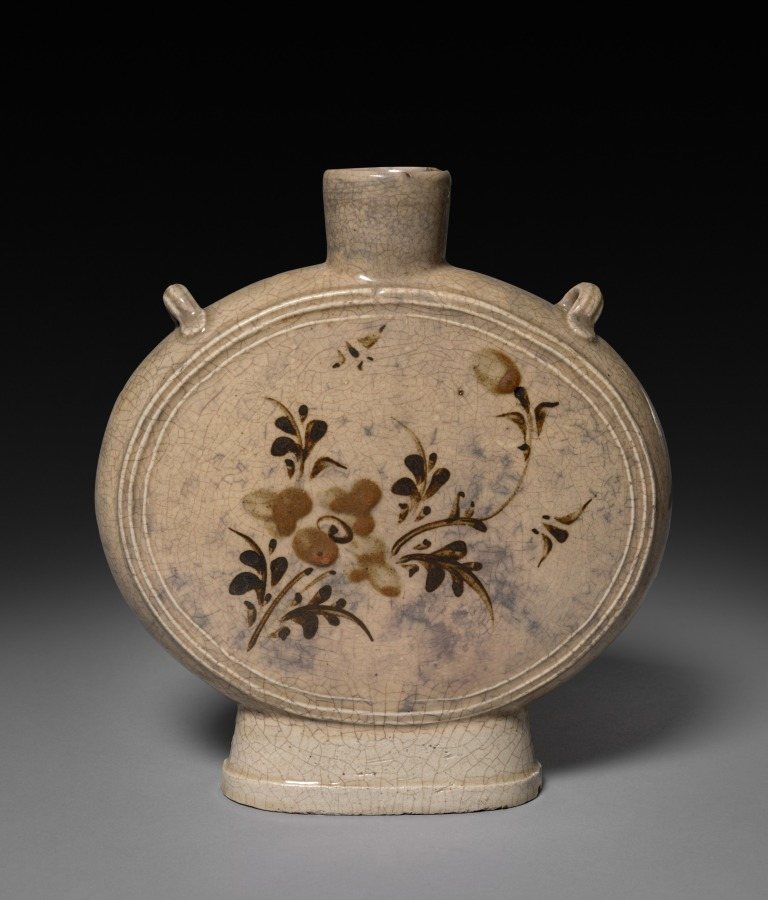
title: Pilgrim Bottle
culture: China, Ming dynasty (1368–1644)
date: 1368–1644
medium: porcelain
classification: Ceramic